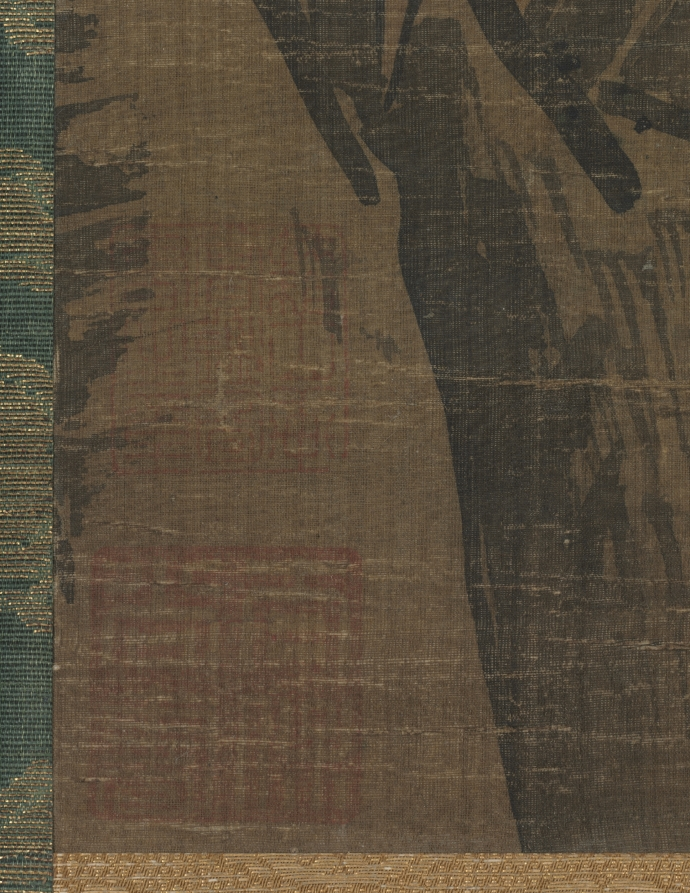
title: The Hermit Xu You Resting by a Stream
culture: China, Ming dynasty (1368–1644)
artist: Dai Jin (Chinese, 1388–1462)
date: 1400s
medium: Hanging scroll; ink and slight color on silk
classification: Painting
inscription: 5 seals: 1 of Huang Lin 黄琳 (active about 1496–1532); 4 unidentified.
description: Xu You, a recluse who refused the throne offered to him by legendary Emperor Yao, chose instead to farm on Mount Ji. Sitting under cliffs, his left arm resting on his risen leg and his loose robe revealing his belly, he displays a nonchalant attitude. Xu You is wearing a laborer’s outfit, a short robe and tight leggings, while his composed pose and gentle features reveal his lofty character. The composition shows rising mountains on the left juxtaposed by open space on the far right. Powerful brushstrokes and nuanced ink washes follow the style of the Southern Song (1127–1279) academy painters.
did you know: When the emperor offered him a post overseeing the Nine Territories (as China was known in ancient times), Xu You went to the River Ying to cleanse his ears from such an unwelcome proposition.